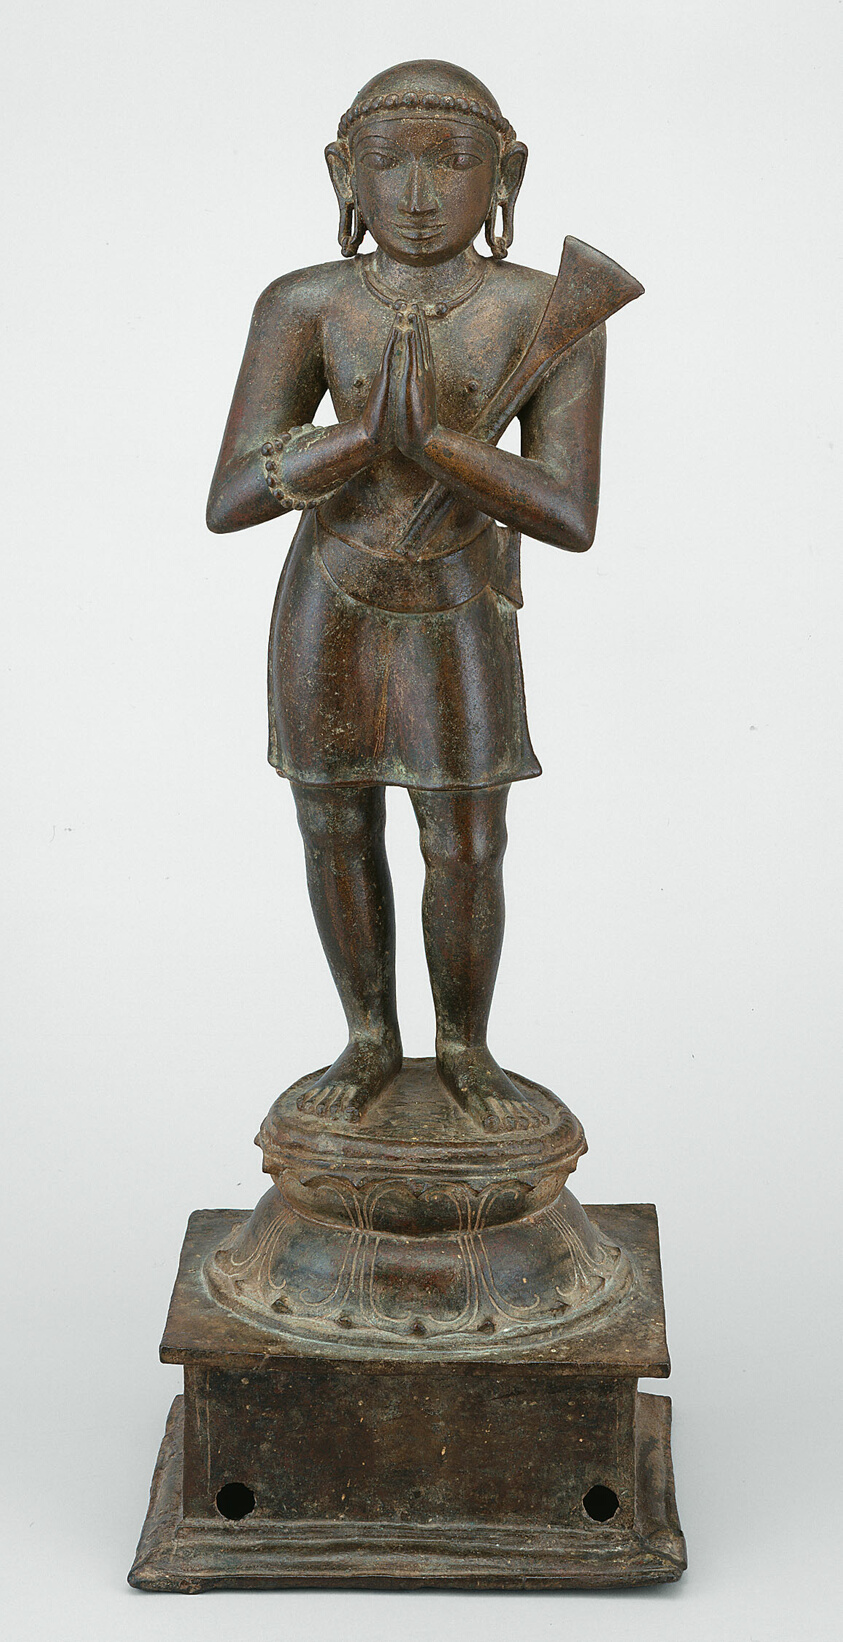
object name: Sculpture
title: Shaiva Saint Appar, Holding a Spade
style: South Asian, chola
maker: India; Tamil Nadu, Thanjavur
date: 14th century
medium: Bronze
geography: Thanjavur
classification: bronze; metal; sculpture; asian art